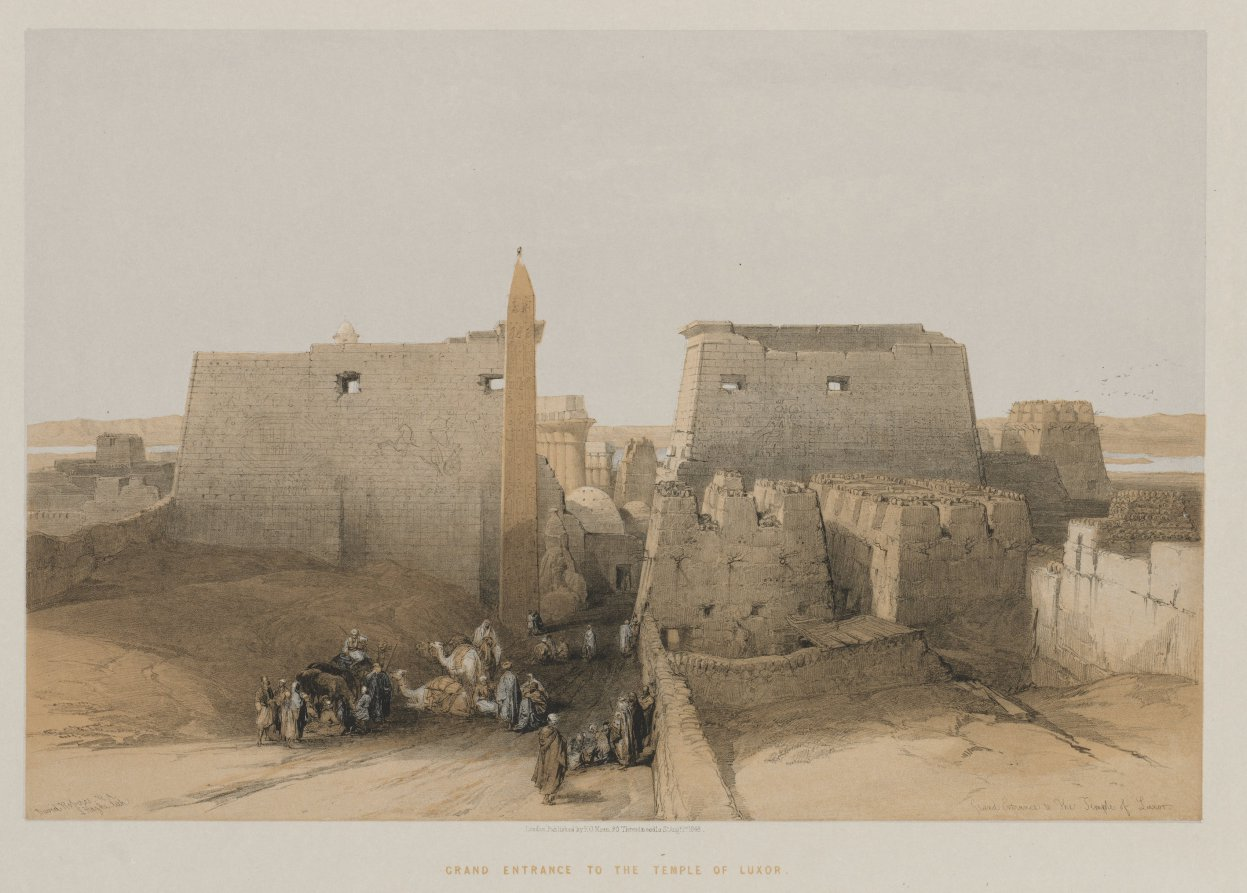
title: Egypt and Nubia, Volume II: Grand Entrance to the Temple of Luxor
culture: England, 19th century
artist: Louis Haghe (British, 1806–1885)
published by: F. G. Moon, 20 Threadneedle Street, London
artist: after David Roberts (Scottish, 1796–1864)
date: 1848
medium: color lithograph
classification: Print